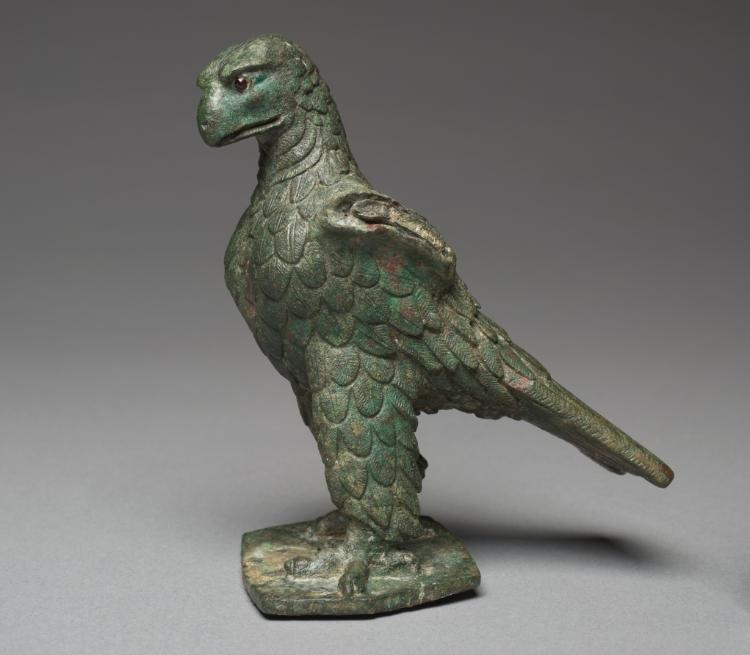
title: Imperial Eagle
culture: probably Syria, Roman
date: 100 BCE–100 CE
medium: bronze with garnet inlays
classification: Sculpture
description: This eagle stands on an integrated bronze base with overlapping ovoid-shaped feathers creating a layered pattern across its body, and its tail feathers fanned out. The wings, now lost, were likely cast separately in bronze and then soldered or welded to the bird’s body. The eyes are inlaid with red stones believed to be garnets. The eagle is associated with Jupiter, king of the gods, and the Roman poets Virgil and Horace described the birds as the bearers of his thunderbolt. While eagles were often depicted on Roman coins, the bird is rarely depicted in the round in Roman art.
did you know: The eagle was a symbol of the Roman Empire and its military.